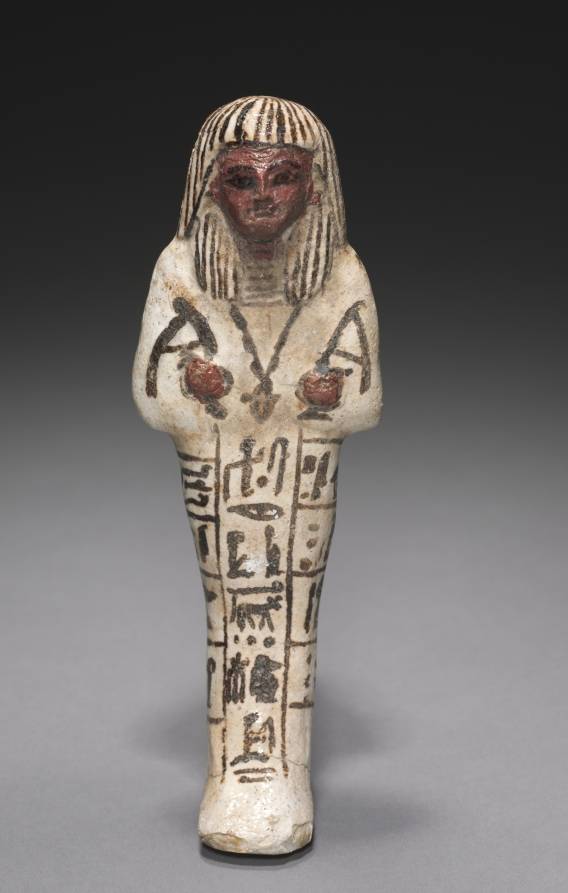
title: Shawabty of Djehutymose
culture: Egypt, New Kingdom (1540–1069 BCE), Dynasty 19, reign of Ramesses II (1279–1213 BCE)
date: 1279–1213 BCE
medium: polychrome faience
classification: Funerary Equipment